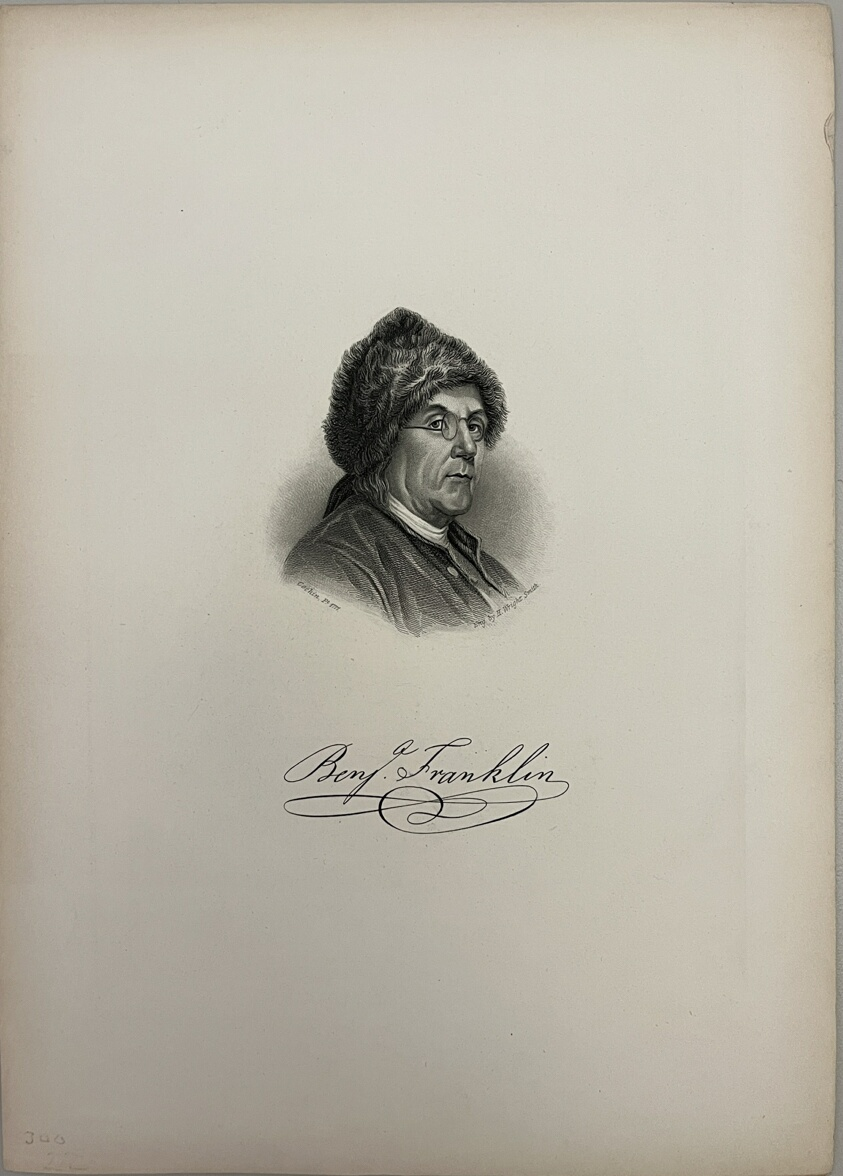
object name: Print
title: Benjamin Franklin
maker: Henry Wright Smith (American, active 1828); after Charles Nicolas Cochin II (French, 1715–1790)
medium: Stipple and line engraving on paper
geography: United States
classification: reproduction; print; prints and drawing